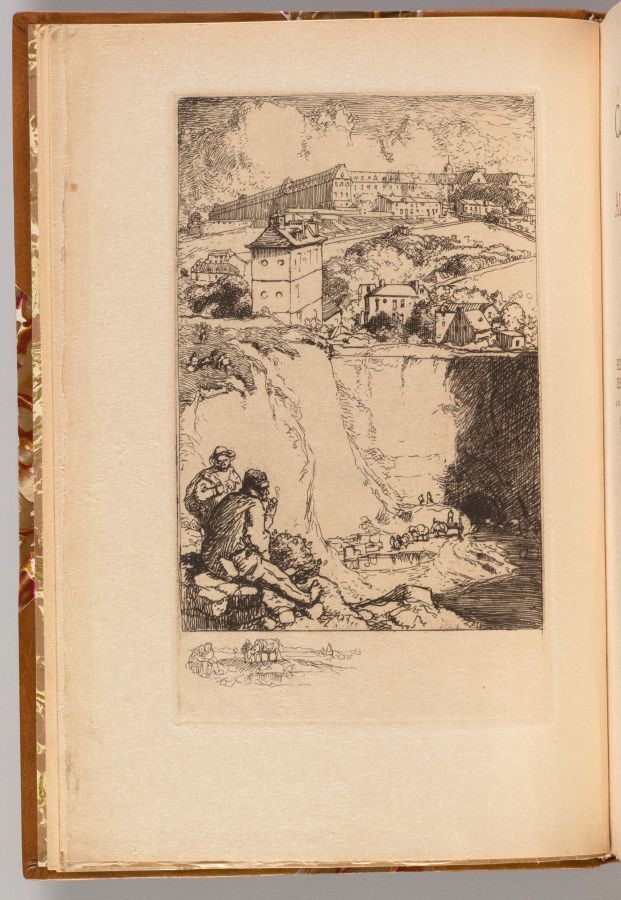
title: Catalogue de L'Exposition de August Lepère: Frontispiece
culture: France, 20th century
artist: Auguste Louis Lepère (French, 1849–1918)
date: 1908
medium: Etching, from leather-bound volume containing two etchings and one lithograph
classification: Bound Volume